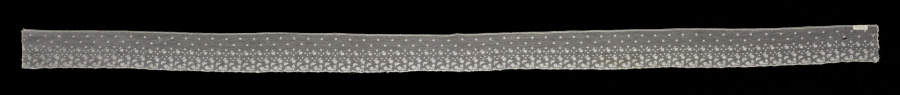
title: Fragment of Lace Edging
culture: France, Valenciennes?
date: 1780–1820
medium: Bobbin lace (Valenciennes)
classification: Lace